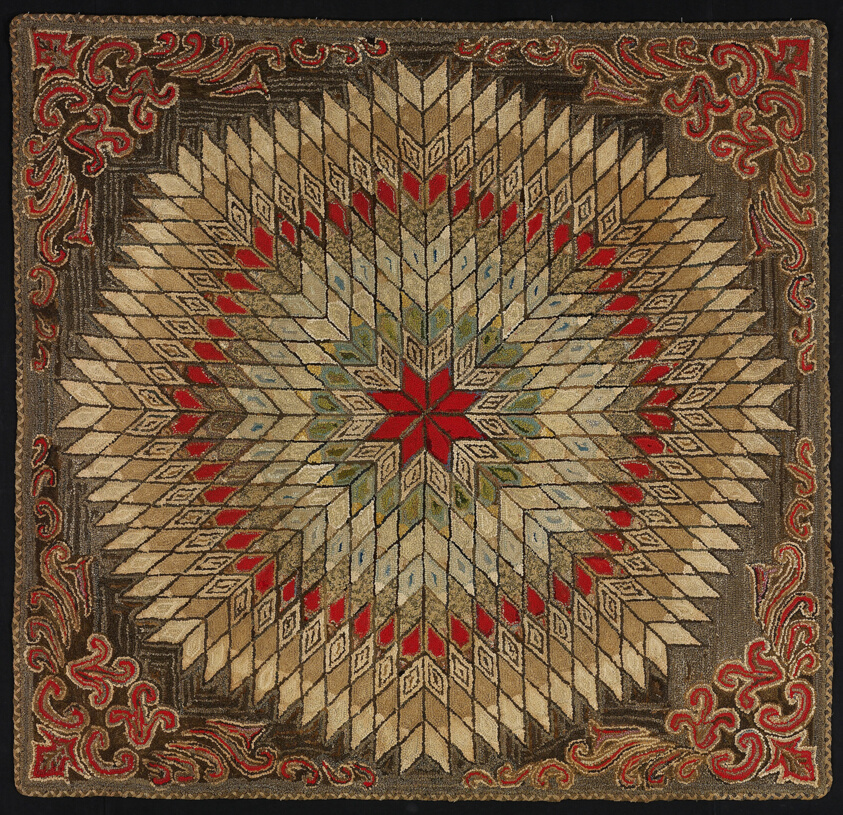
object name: Textile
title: Rug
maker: United States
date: 19th century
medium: Jute, plain weave with cotton and wool yarns, felted, knitted and woven strips forming "hooked" pile; edged with cotton and wool, oblique interlacing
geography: United States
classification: textile; needlework - rug